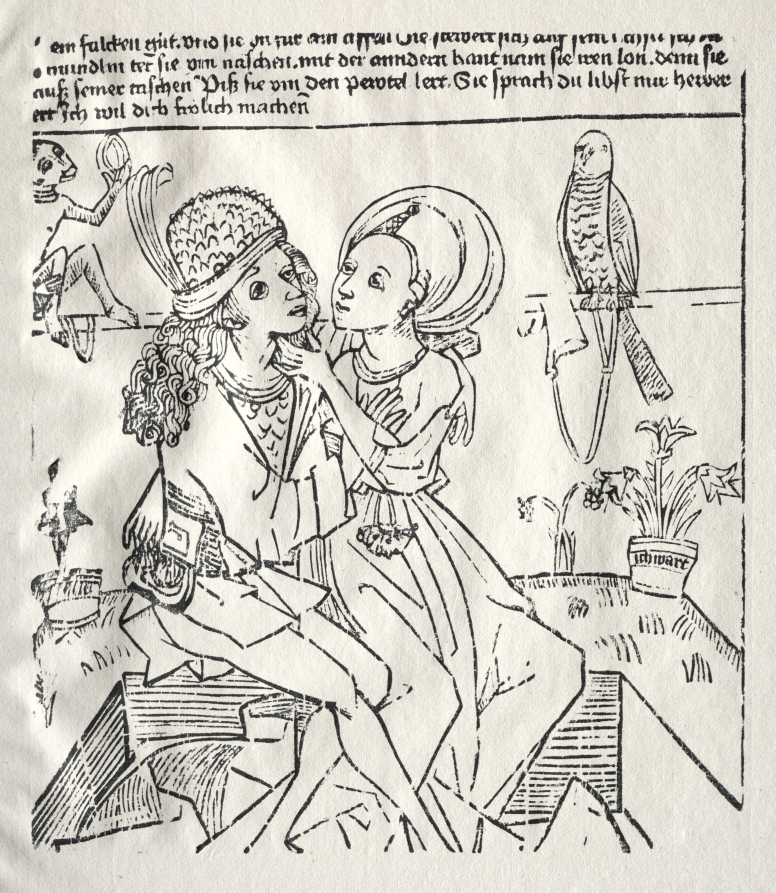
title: The Lovers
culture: Germany, Swabia, 15th century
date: c. 1470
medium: woodcut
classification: Print